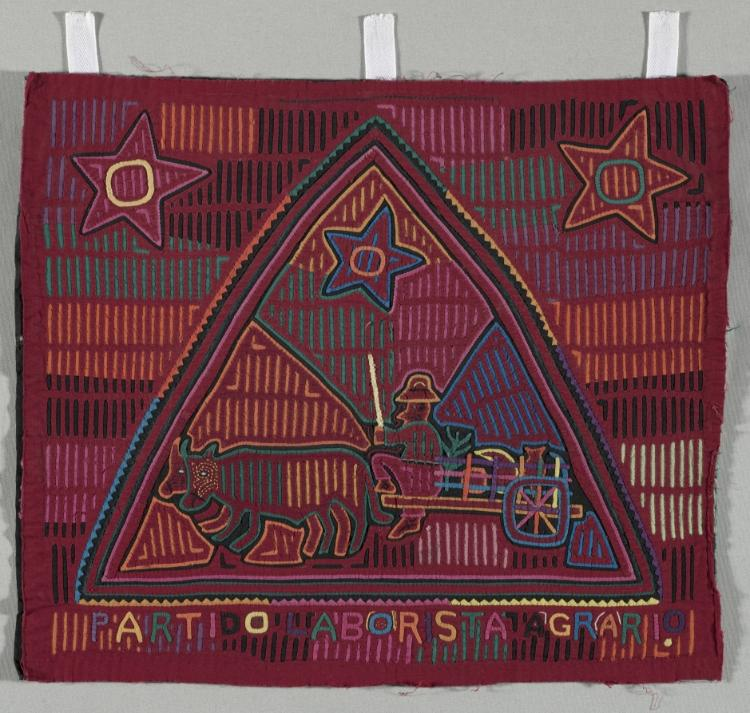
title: Mola Panel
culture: Republic of Panamá, Gunayala Comarca, Guna people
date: mid-1900s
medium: cotton: appliqué, reverse appliqué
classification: Textile